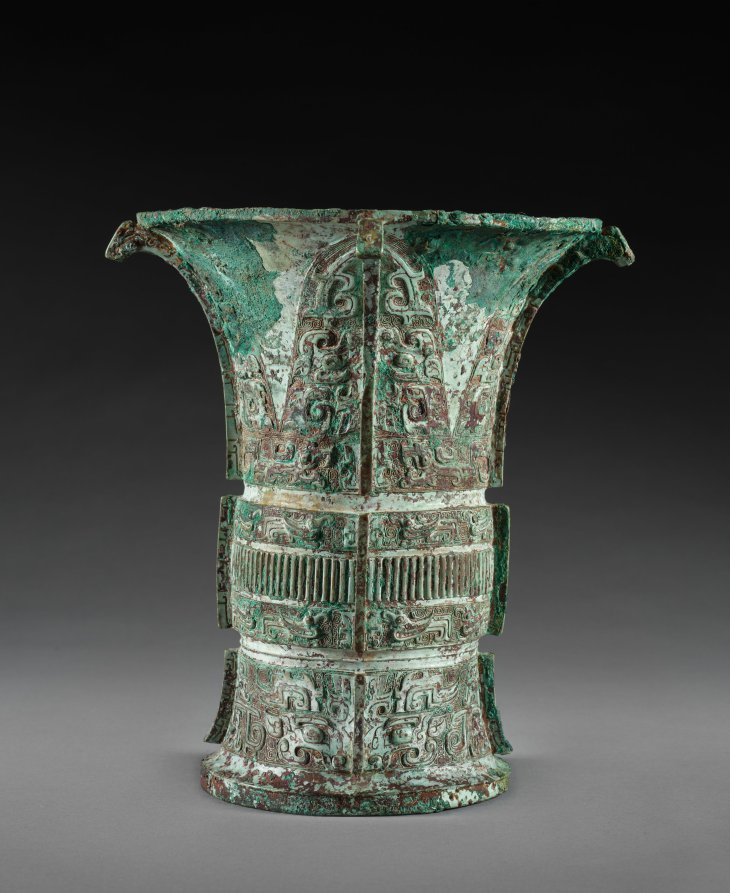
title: Wine Vessel (Fu Wu Zun)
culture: China, Western Zhou dynasty (c. 1046–771 BCE)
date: c. 1000–900 BCE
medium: bronze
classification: Metalwork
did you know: This vessel is decorated with dragons and taotie, a stylized monster face motif frequently found on ancient Chinese ritual bronzes.